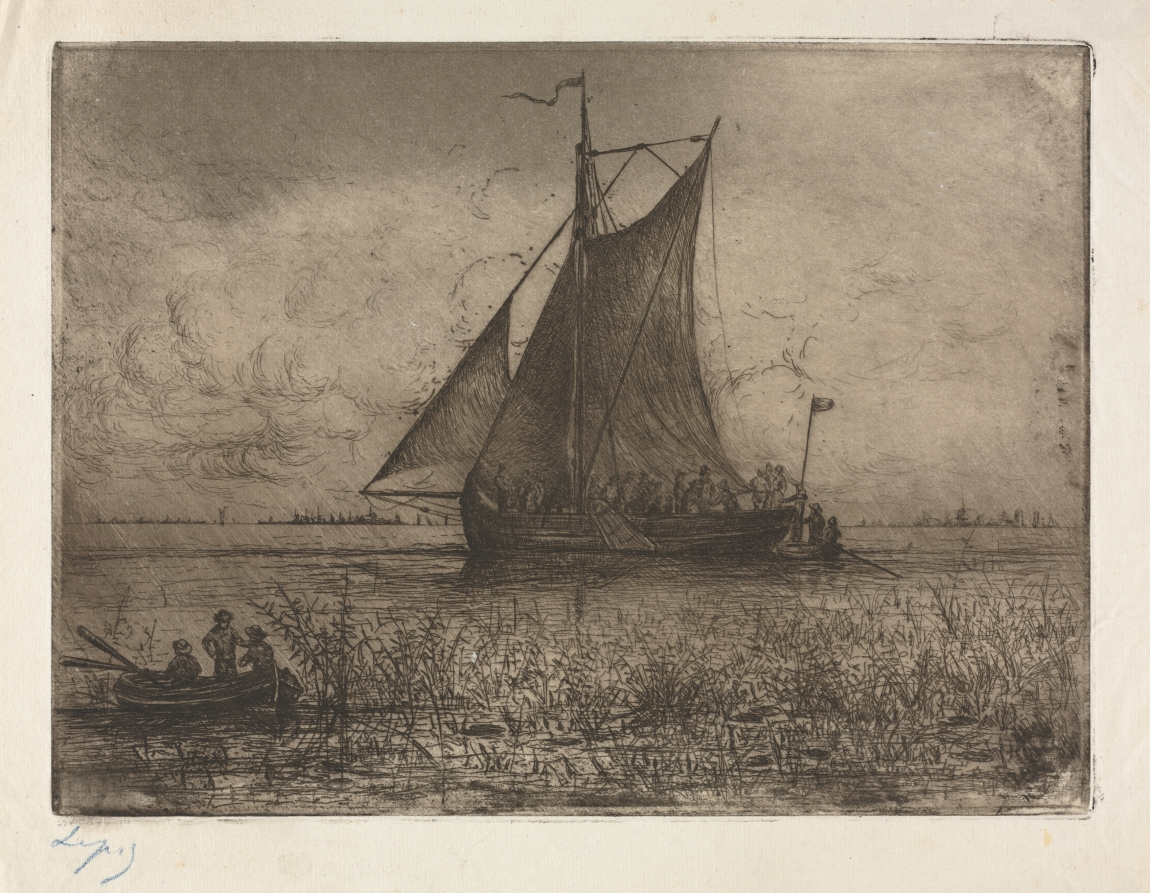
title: Dutch Riverscape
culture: France, 19th century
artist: Ludovic Napoléon, Vicomte Lepic (French, 1839–1889)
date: c. 1860–89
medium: etching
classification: Print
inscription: lower left, in blue crayon: Lepic